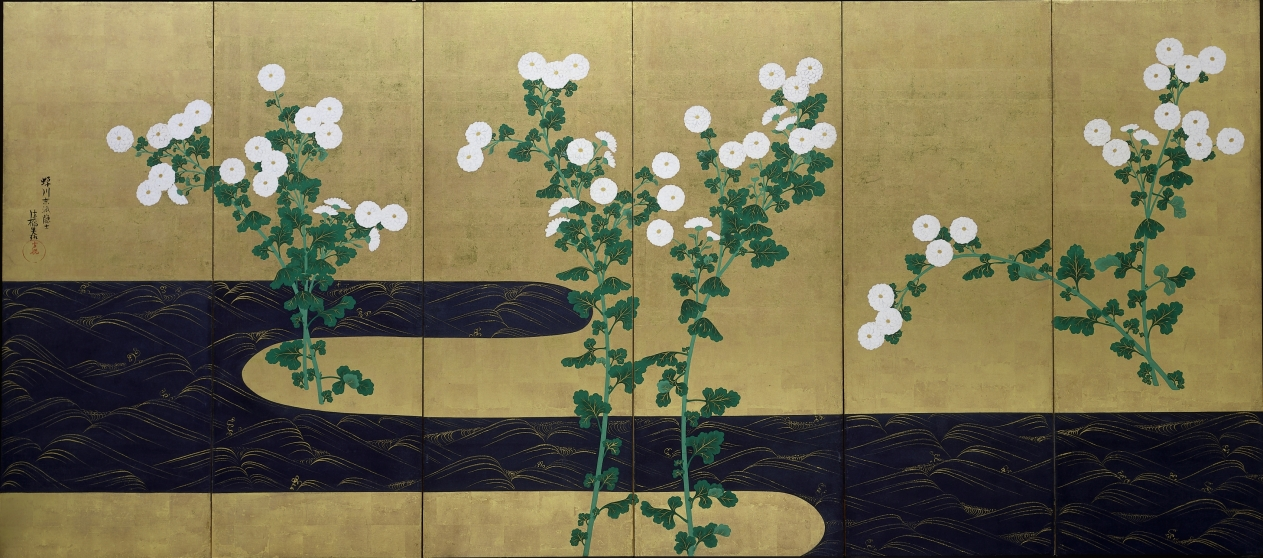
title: Chrysanthemums by a Stream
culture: Japan, Edo period (1615–1868)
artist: possibly by Ogata Kōrin (Japanese, 1658–1716)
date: c. 1715–30 or later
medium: One of a pair of six-panel folding screens; ink and color on gilded paper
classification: Painting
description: These screens recall a painting style so closely identified with Ogata Kōrin (1658–1716) that it is called Rinpa, or “Rin School,” after the ideograph “rin” in his name. The highly stylized background accentuates floral groupings that have been groomed so as to appear utterly artificial, like the synthetic arrangements available today. Kōrin's genius derived in large measure from natural phenomena painstakingly observed and then manipulated to create compositions of startling refinement and sparkling isolation. This process may have grown out of Kōrin's early immersion in the family textile business, a medium that encourages such dramatic distillations of form: the stream's gold-crested waves bring to mind traditional kimono robe designs of Kōrin's era. Works with the signature seen on this painting, including a style name, or persona suggested to Kōrin by his brother Kenzan (1663–1743), are sometimes considered to have been produced either in the last year of his life, when he was very ill, or after his death. In both scenarios, the lion’s share of the work would have been done by studio assistants, but little is truly known of his studio practice. Given the regularity of the gold waves on the stream, and the tension in the arrangement of the chrysanthemums, it is also possible that the screens were made in emulation of Kōrin's designs by a later artist.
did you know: The signature used on these screens may indicate paintings made in the last year of the artist's life, or works completed by his studio after his death.